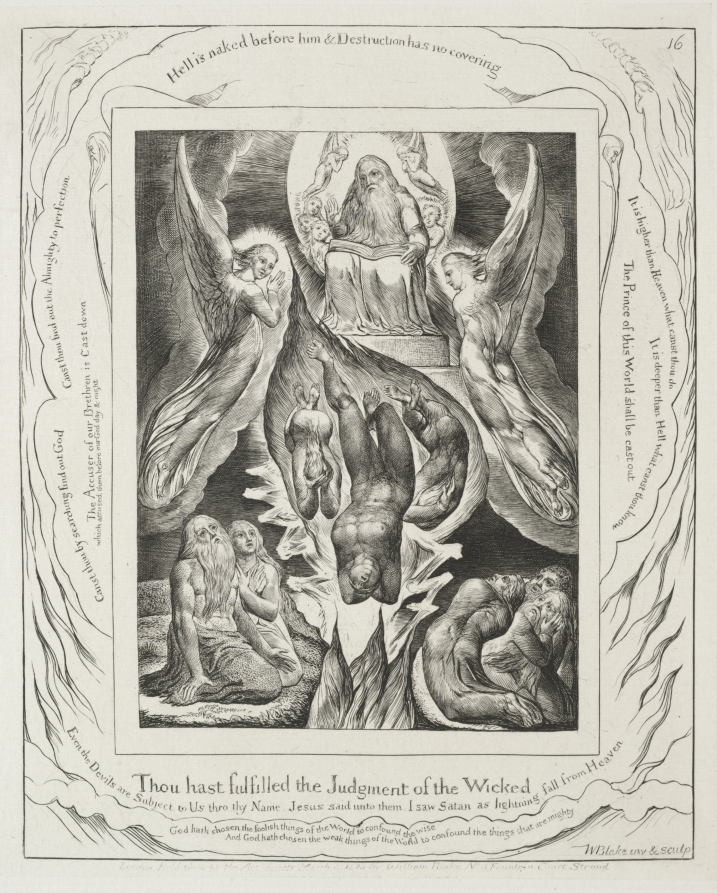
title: The Book of Job: Pl. 16, Thou hast fulfilled the judgment of the wicked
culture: England, 19th century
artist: William Blake (British, 1757–1827)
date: 1825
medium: engraving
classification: Print